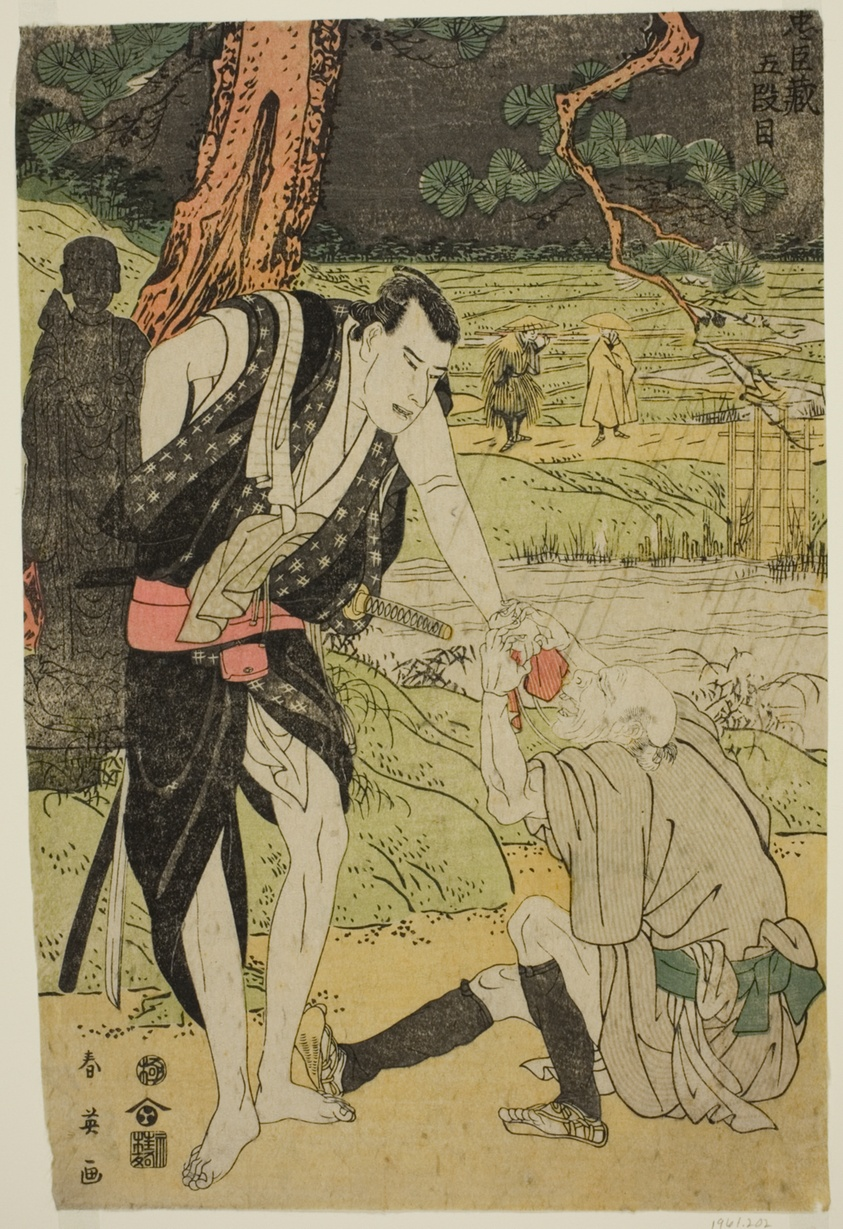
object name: Print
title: Act Five: Yamazaki Highway from the play Chushingura (Treasury of the Forty-seven Loyal Retainers)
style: Japanese (culture or style)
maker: Katsukawa Shun'ei (Japanese, 1762-1819)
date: c. 1795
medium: Color woodblock print; aiban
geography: Japan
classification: woodblock print; print; asian art